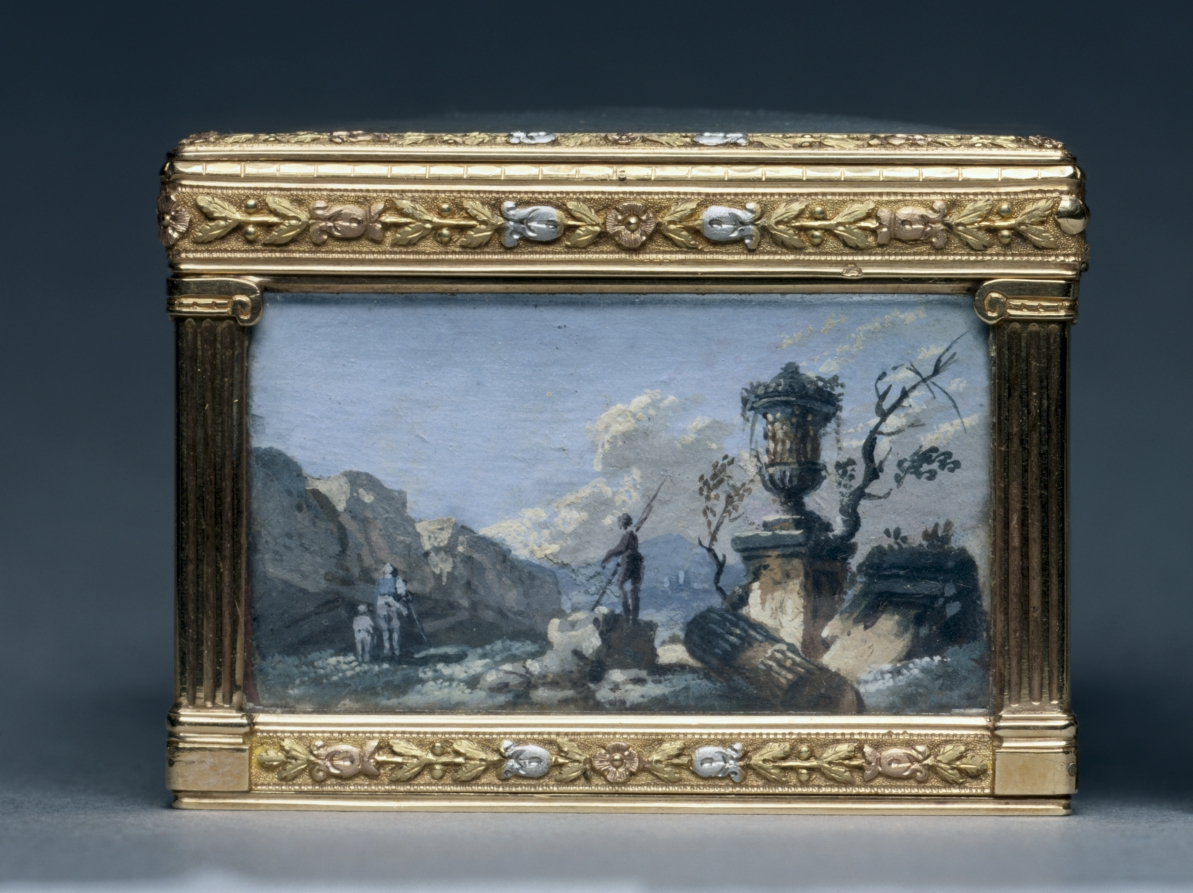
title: Rectangular Box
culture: France, 19th century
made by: Alexandre Leferre (French)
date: c. 1840–1850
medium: gouache miniatures mounted on gold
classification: Miscellaneous